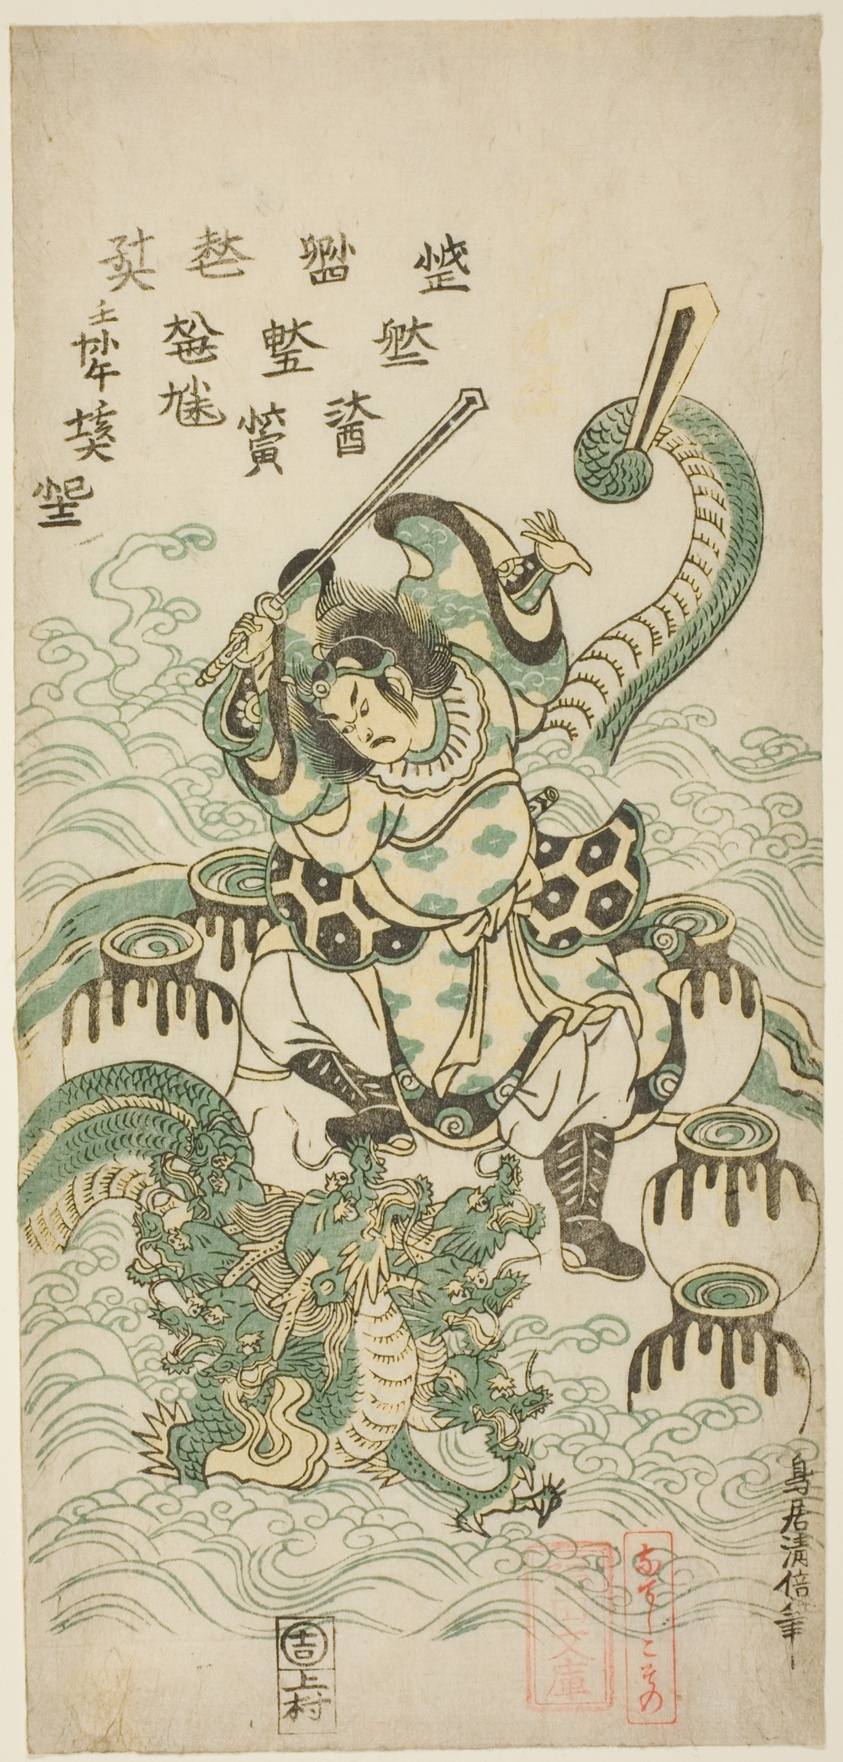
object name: Print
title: Susano-o no Mikoto Killing the Eight-headed Dragon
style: Japanese (culture or style)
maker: Torii Kiyomasu II (Japanese, 1706 (?)–1763 (?))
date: 1748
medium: Color woodblock print; hosoban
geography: Japan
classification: woodblock print; print; asian art